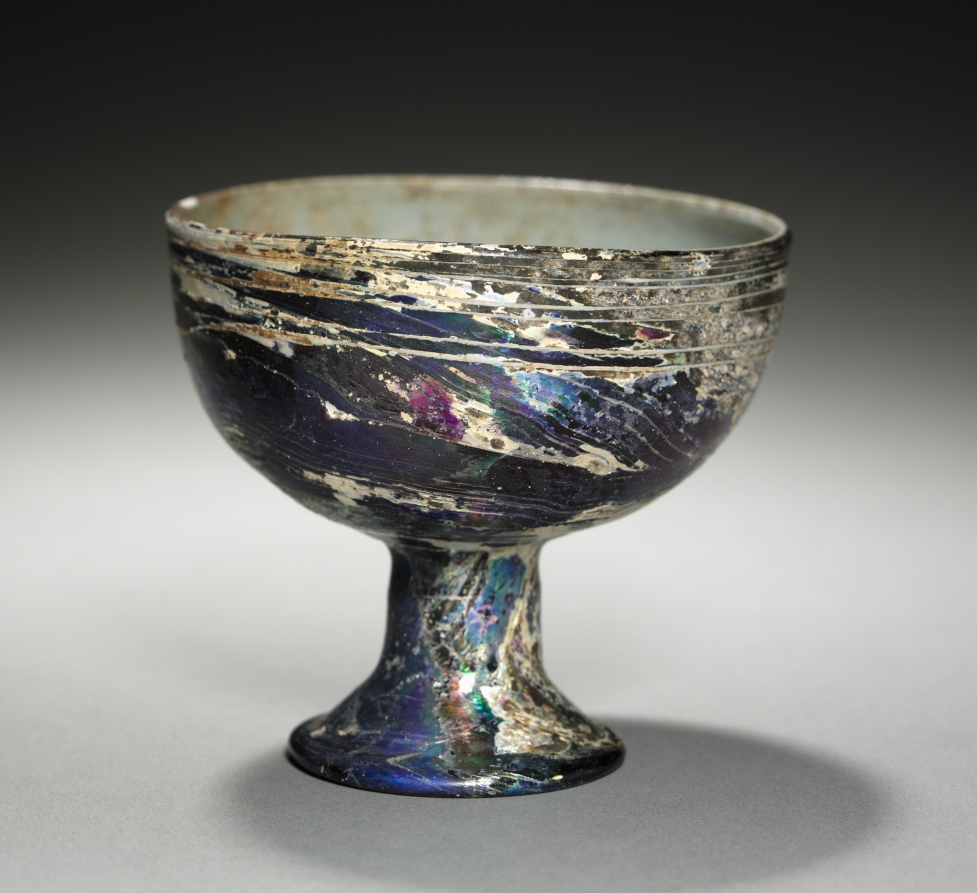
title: Chalice (?)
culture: Italy, Roman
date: 100–300 CE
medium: glass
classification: Glass